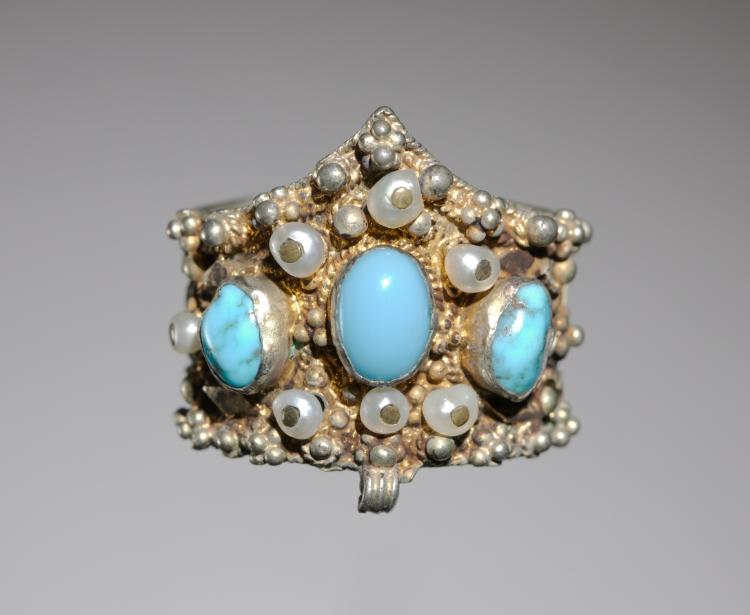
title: Ring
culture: North Africa, 19th century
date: 1800s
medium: Silver gilding, turquoise, and pearls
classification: Jewelry